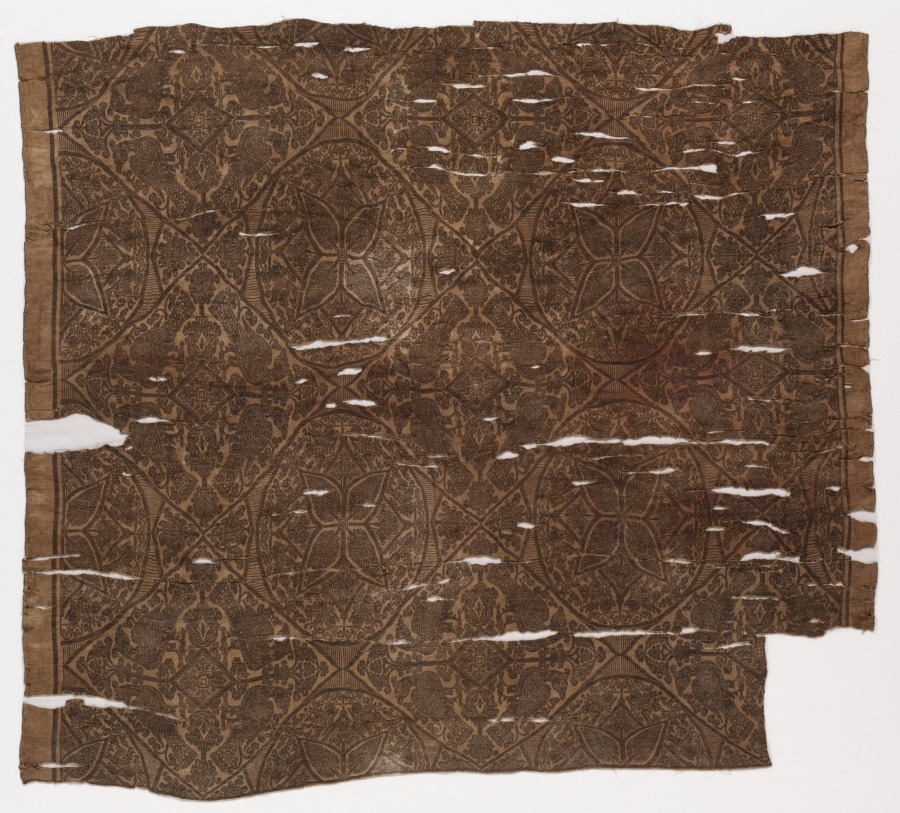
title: Fragments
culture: Iran or Iraq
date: 1420–1955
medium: Silk: compound twill weave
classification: Textile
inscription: li-yasta 'malhu al-amir al-ajall Qawam al-Mulk Abu 'Abd Allah 'Isa bin Ibrahim al-Harithi atala Allah fi al-m'ali baqa['a]hu wa-harasa fi iqtifa[']al-makarim fana['a]hu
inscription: sana'ahu 'Ali bin Yusuf bin al-Marzuban al-...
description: The weave provides different design for each side of this fragment. On the front, the overall lozenge pattern has alternating rows of ornamented ovals and diamonds. The large diamonds have a large four-leaved motif superimposed over a diamond with trees in each corner. The foliate ground with four pairs of opposed griffins fills the interspaces to the oval border. The diamonds have two opposed pairs of birds each flanking a Tree of Life and standing on a plant motif; these enclose a smaller central diamond with trees in each corner and a central square. On the reverse, the plain ground of natural tan has two brown bands with large and small Kufic inscriptions.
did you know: The design is at right angles to the warp.